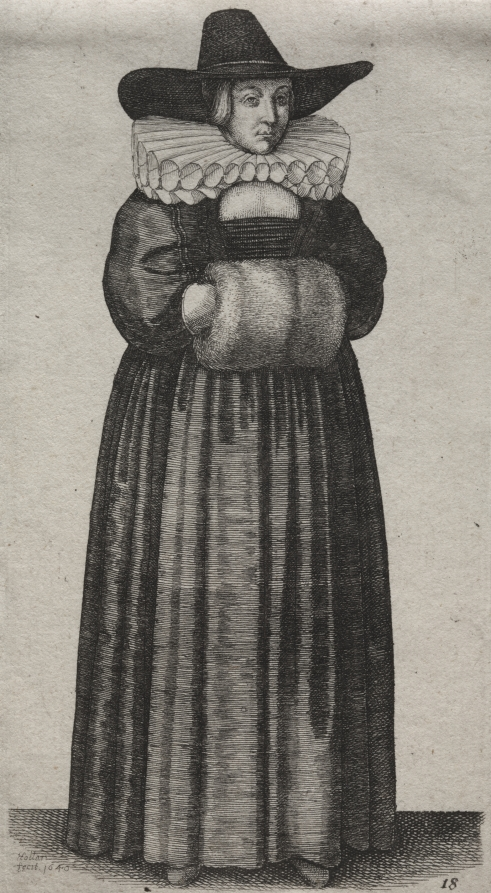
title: The Several Habits of English Women, from the Nobility to the Country Women as they are in these times: The Woman with a Mannish Hat and Light Muff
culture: Bohemia, 17th century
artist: Wenceslaus Hollar (Bohemian, 1607–1677)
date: 1640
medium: etching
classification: Print